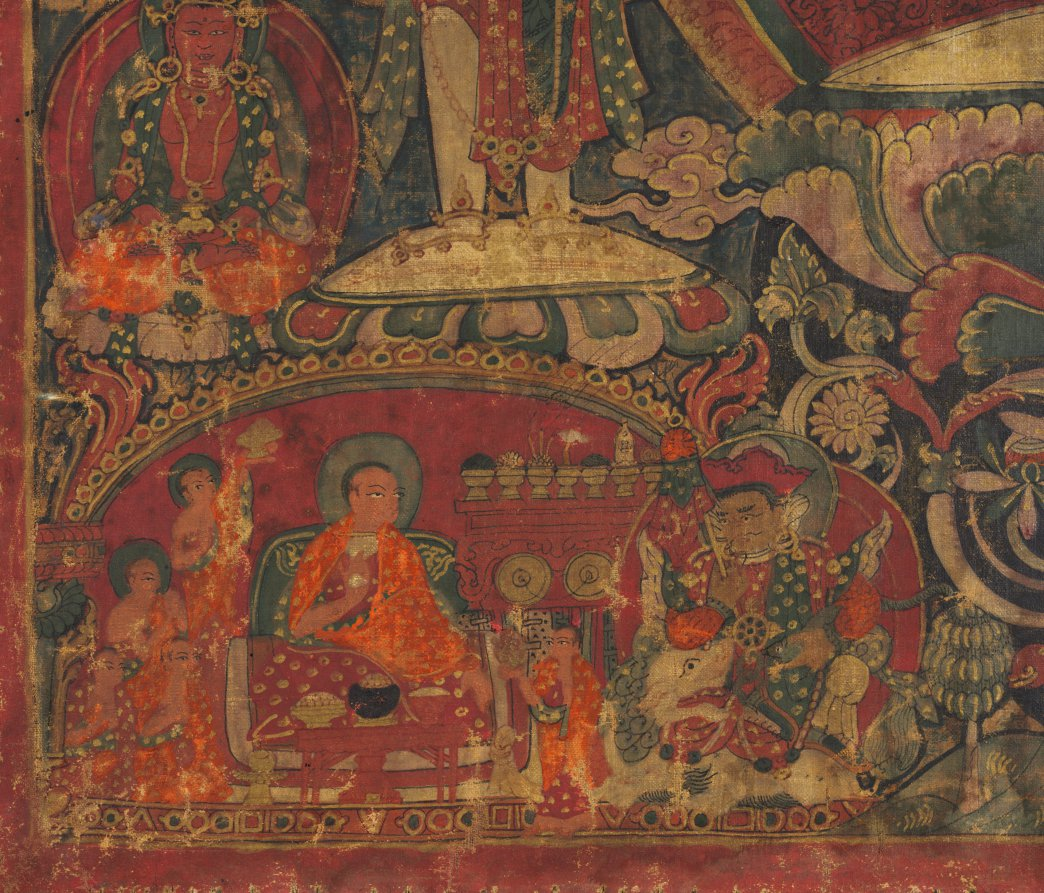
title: Eleven-Headed, Thousand-Armed Bodhisattva of Compassion (Avalokiteshvara)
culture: Western Tibet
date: c. 1500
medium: Gum tempera and ink on cotton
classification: Painting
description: One thousand arms surround the central figure like a radiating halo. Each hand has an eye in the palm to see the suffering of all beings, generating the sense of compassion that this figure embodies. The special form of the central image of the bodhisattva Avalokiteshvara derives from the mystic vision of a nun named Gelongma Palmo, who was born a Kashmiri princess, but prayed for leprosy to avoid having to marry and became an accomplished nun. While meditating in a cave, she achieved this vision of 11-headed, 1,000-armed Avalokiteshvara, who cured her leprosy and guided her on the path to enlightenment.